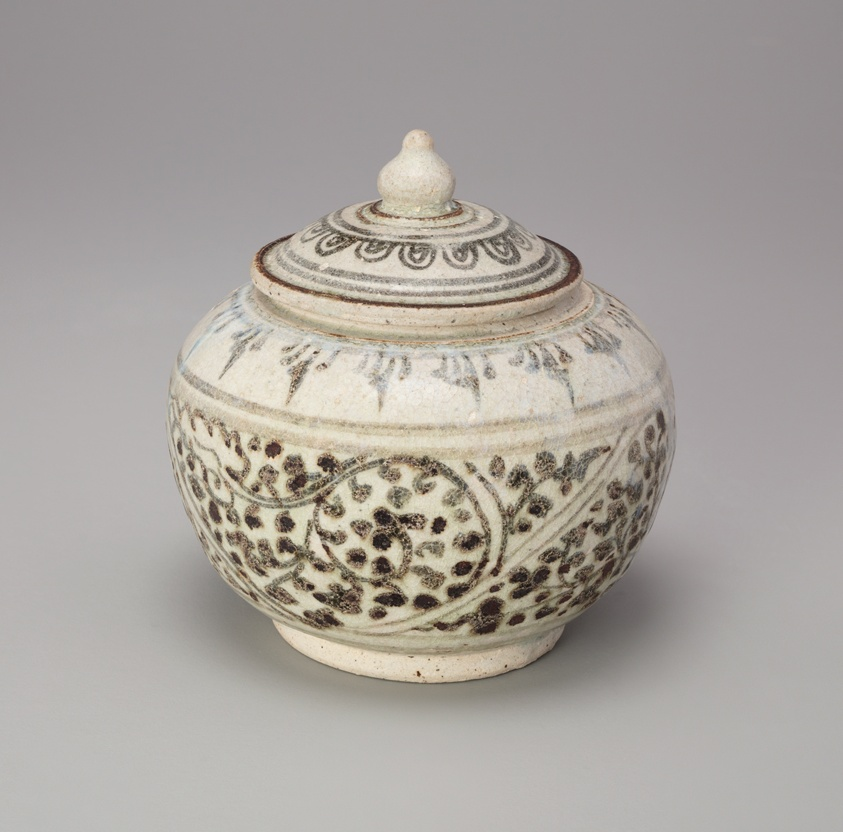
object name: Decorative Arts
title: Sawankhalok Ware Covered Box with Lotus Bud Knob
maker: Thailand, Sukhothai Province, Si Satchanalai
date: 14th/15th century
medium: Glazed stoneware with iron-brown underglaze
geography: Sawankhalok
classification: ceramics; asian art; decorative arts